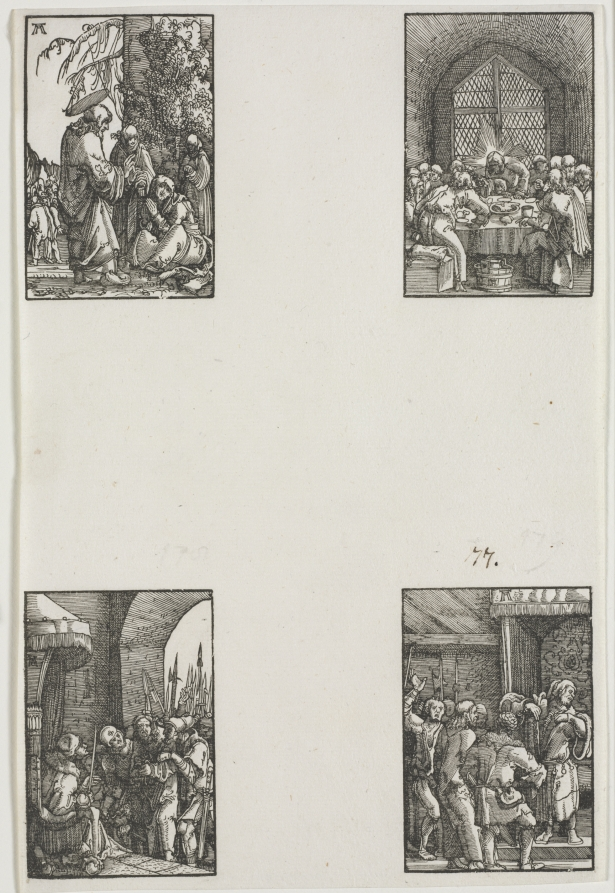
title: The Fall and Redemption of Man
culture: Germany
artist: Albrecht Altdorfer (German, c. 1480–1538)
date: c. 1515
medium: woodcut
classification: Print